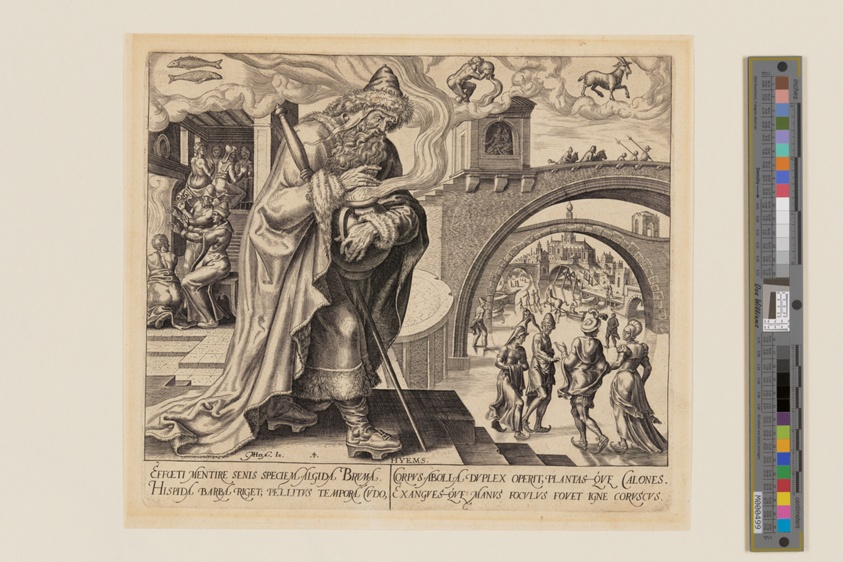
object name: Print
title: Winter, from The Four Seasons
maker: Philips Galle (Flemish, 1537-1612); after Maerten van Heemskerck (Dutch, 1498–1574)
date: 1563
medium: Engraving on ivory laid paper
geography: Flanders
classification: engraving; paper; print; prints and drawing